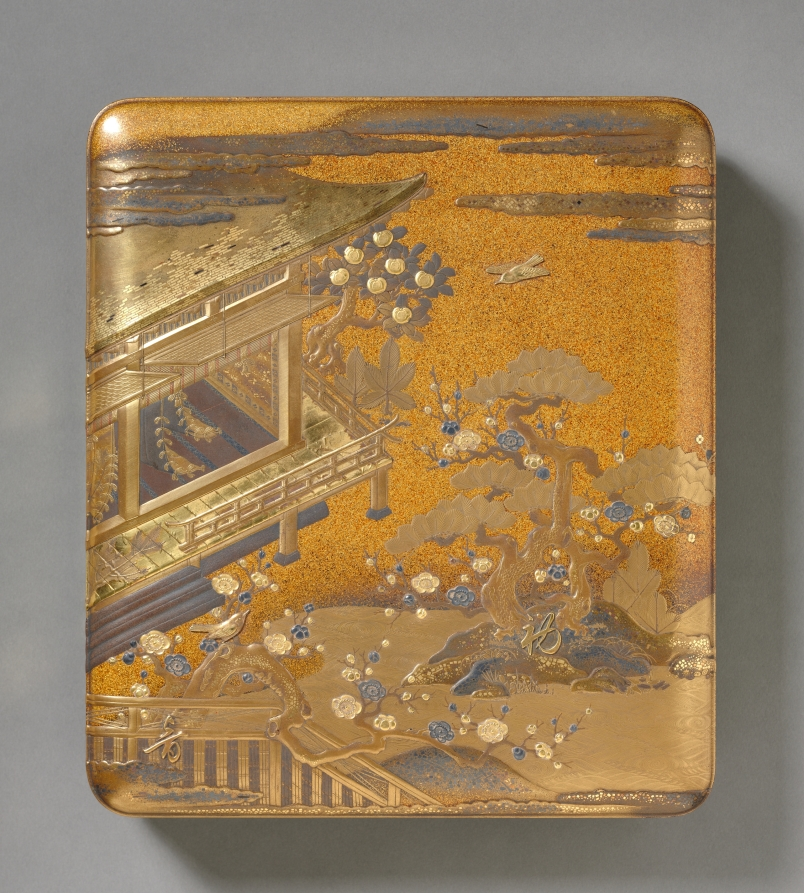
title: Writing Box (Suzuribako) with the “First Song” (Hatsune) Chapter from the Tale of Genji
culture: Japan, Meiji period (1868–1912)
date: early 1900s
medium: Lacquered wood with gold and silver sprinkled powder (maki-e), foil application (kirikane), and metal inlay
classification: Lacquer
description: The design of this box was inspired by an object in the 1639 lacquer wedding set of Chiyohime, the daughter of the shogun (ruler). Information about the set became available in the Meiji period, leading some lacquer artists to emulate its designs. This box features a scene from the chapter “First Song” (Hatsune) of the Tale of Genji, in which Prince Genji and his love Murasaki enjoy her garden. It incorporates the written characters for “first” (初, hatsu) and “sound” (音, ne), indicating the first song of the warbler in spring, associated with the new year—the water dropper for mixing the ink is in the shape of this bird.